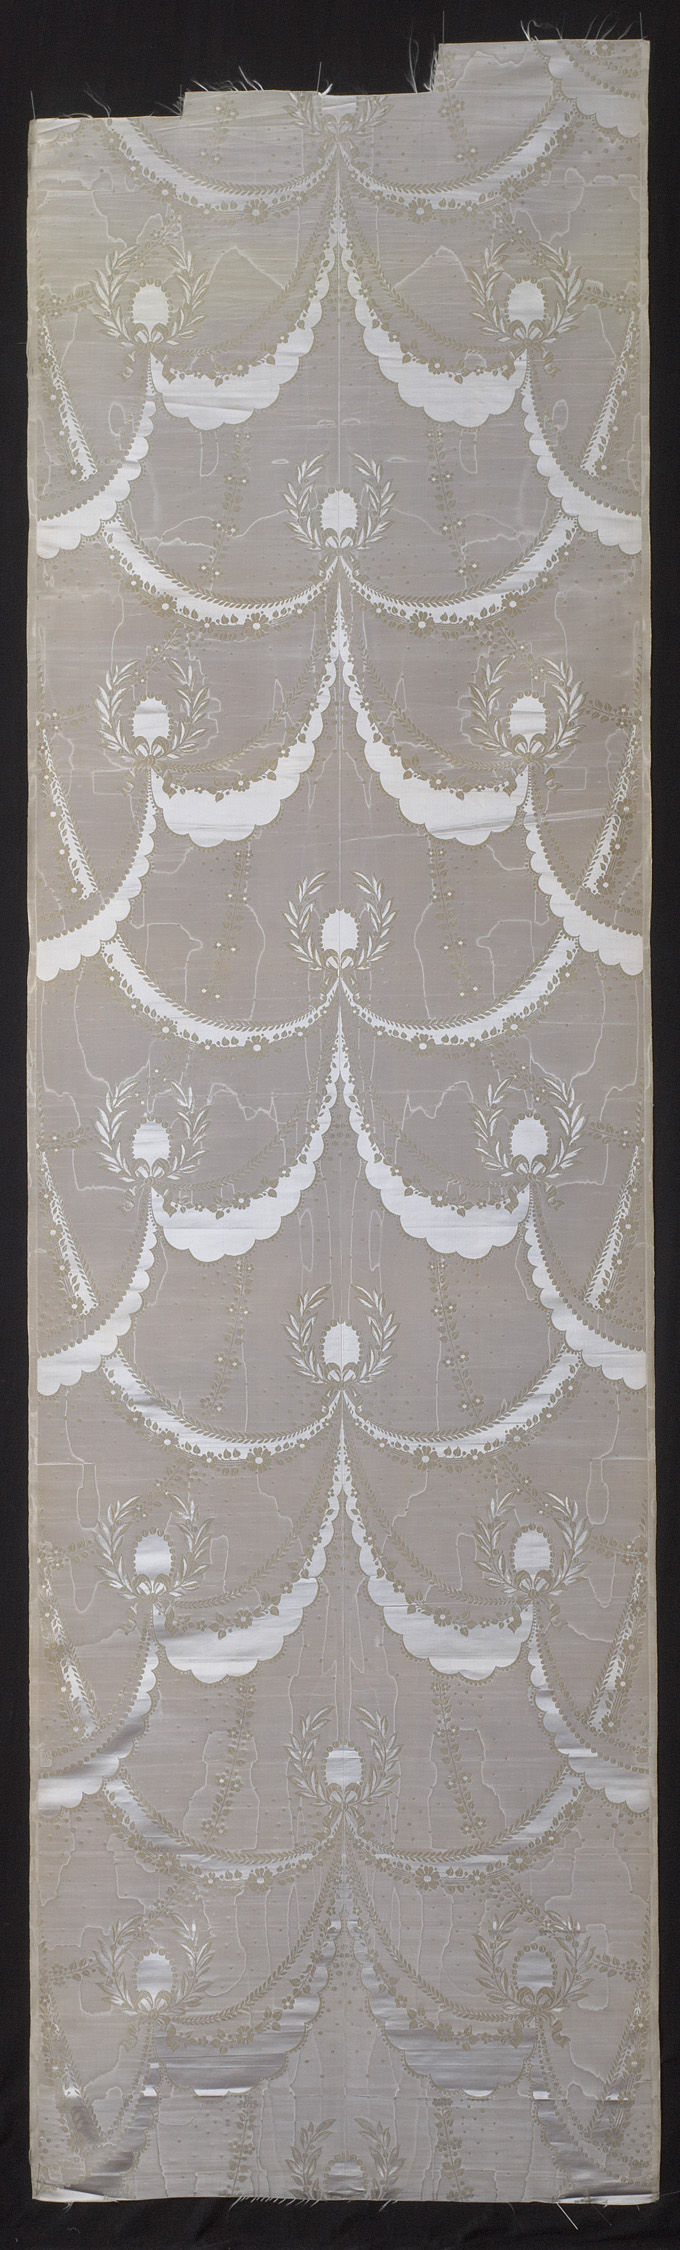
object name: Textile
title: Length of Dress or Furnishing Fabric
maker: France, possibly Lyon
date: 1852/70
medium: Silk, plain weave with self-patterning weft floats and areas of satin weave; watered (moiré)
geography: Lyon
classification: textile; weaving; furnishing textile